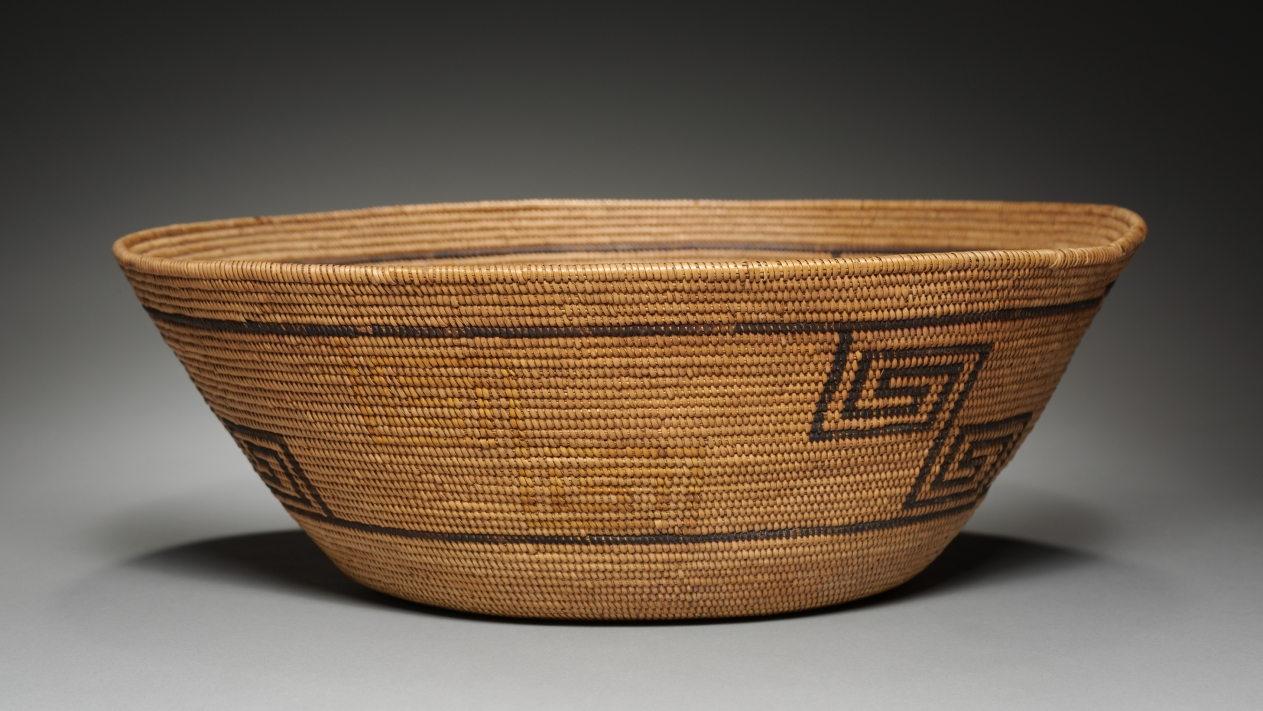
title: Food Bowl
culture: California, Mission, Late 19th- Early 20th century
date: c 1875– 1924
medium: coiled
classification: Basketry